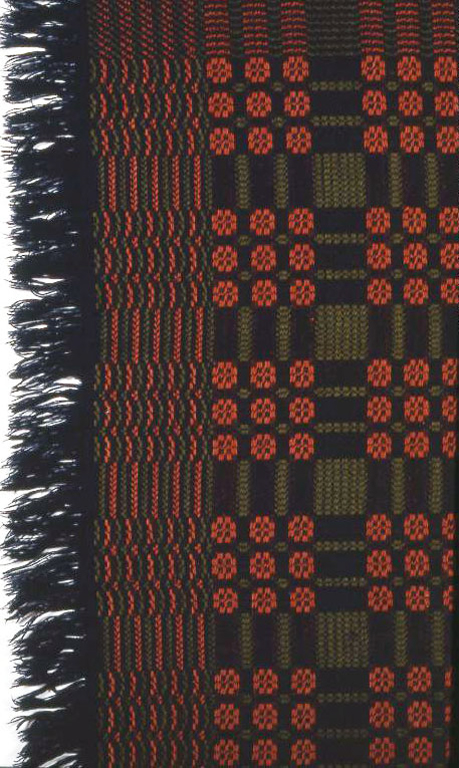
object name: Textile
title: Coverlet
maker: United States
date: 1820s/30s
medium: Wool, plain weave with supplementary patterning wefts (overshot) and main warp fringe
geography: United States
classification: weaving - coverlet; coverlet; textile; weaving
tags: geometric motif, coverlet, stripes, rectangles, squares